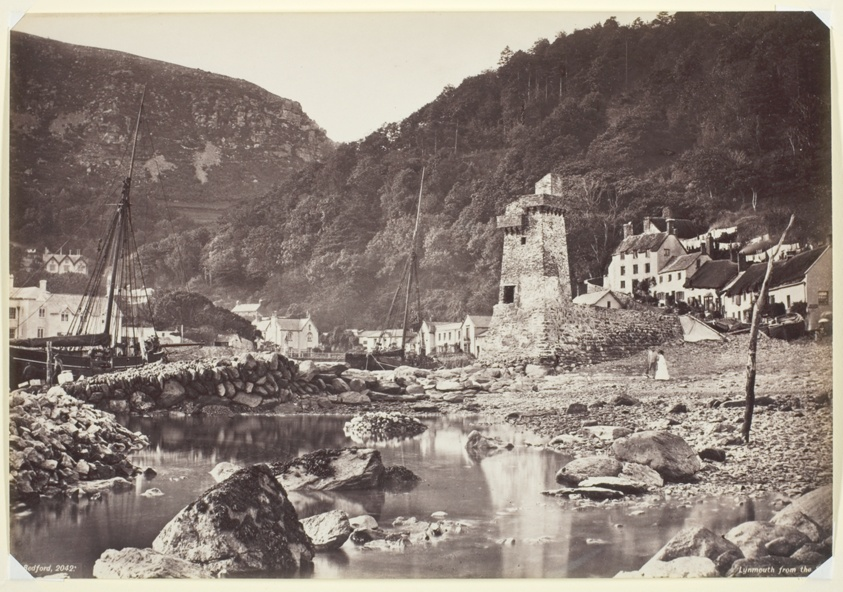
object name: Photograph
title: Lynmouth from the Sea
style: 19th century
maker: Francis Bedford (English, 1816–1894)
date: 1860/94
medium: Albumen print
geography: England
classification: albumen silver print; photographic process; photography; photograph